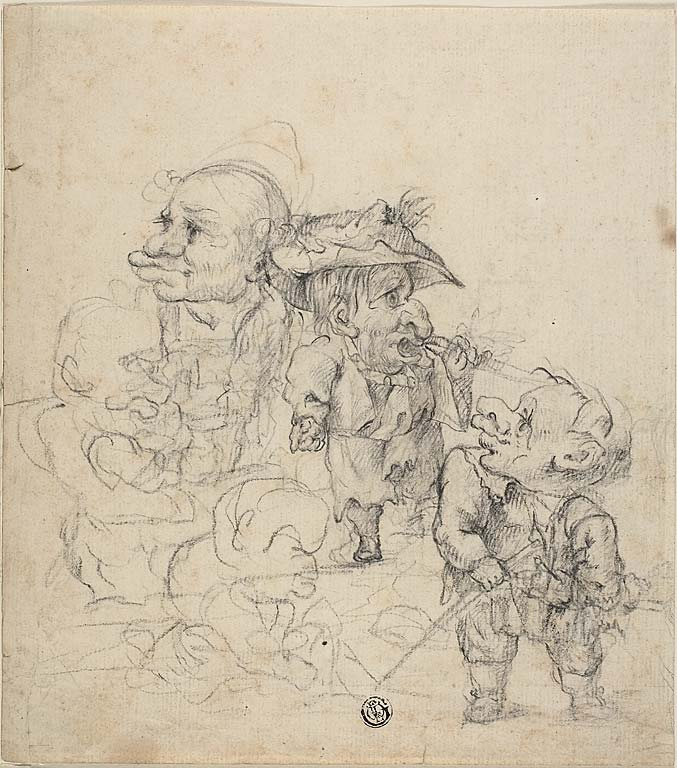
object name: Drawing and Watercolor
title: Five Caricatures of Men (recto); Sketch of Male Figure and Bird (verso)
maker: Follower of Faustino Bocchi (Italian, 1659-1742); or possibly after Faustino Bocchi (Italian, 1659-1742)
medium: Black chalk (recto and verso) on ivory laid paper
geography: Italy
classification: chalk; drawings (visual works); prints and drawing